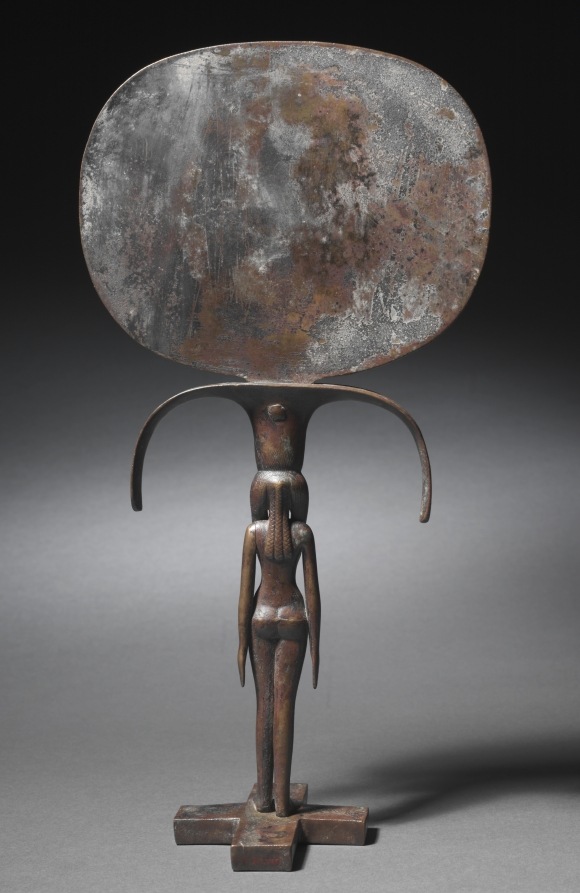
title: Caryatid Mirror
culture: Egypt, New Kingdom (1540–1069 BCE), Dynasty 18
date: c. 1540–1296 BCE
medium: bronze with black copper inlay?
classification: Cosmetic Objects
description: This superb mirror has an oval disk and a handle in the form of a nubile young girl, entirely naked except for her elaborately braided tripartite wig, broad collar, and a girdle of wallet beads. She stands on a cruciform base, with her left foot slightly advanced and her hands at her sides. On her head and supporting the disk is a papyrus umbel with flaring tips. Mirrors with handles in the form of naked young girls were the height of fashion in mid-Dynasty 18; numerous examples exist. This mirror is perhaps the finest of its kind. The cruciform base is unusual, if not unique. The iconography is understandable in relation to the goddess Hathor, the embodiment of love and beauty. A multifaceted goddess, she was equated with Aphrodite by the Greeks. The retinue of Hathor consisted precisely of such beauties, called nefrut in Egyptian, and the mirror itself, that reflection of beauty, appears to have had Hathorian connections from early times.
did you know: When they were made, this mirror was polished to a brilliant shine; the marvelous colored patina it has since acquired is the result of being buried for years in the ground.